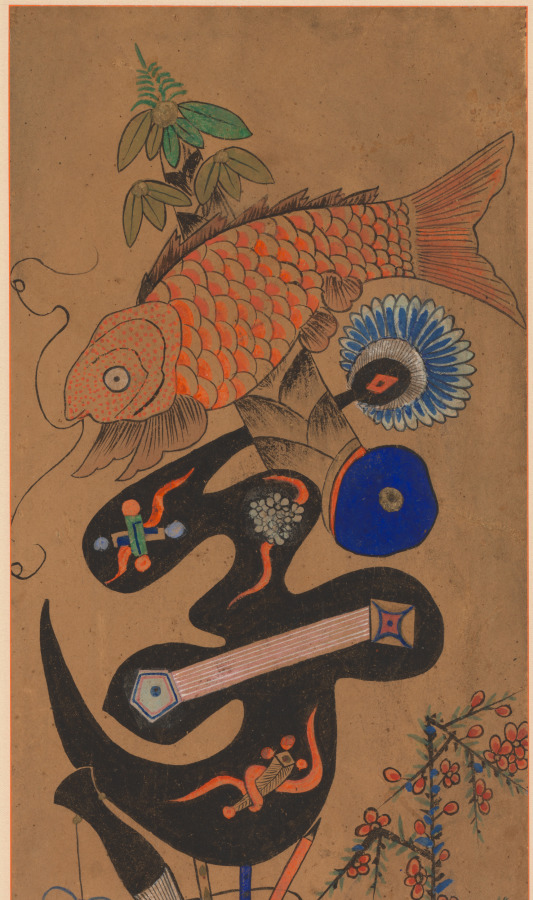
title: Munja-Chaekgeori Screen (Character-Books Screen)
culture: Korea, Joseon dynasty (1392–1910)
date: early 1900s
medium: Eight-panel folding screen, ink on paper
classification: Painting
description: This folding screen is a whimsical harmony of two different subjects: chaekgeori, or books and things; and munja, or characters. The lower section of each panel depicts the imagery of things, including books, decorative arts, and utilitarian objects. The upper portion of each panel bears a classical Chinese character. Read from far right to left, the eight characters refer to the values of Confucian teachings of the Joseon dynasty: filial piety, brotherly love, loyalty, trust, propriety, righteousness, modesty, and humility. While these two pictorial genres are harmoniously conjoined on the same picture plane, two sharply contrasting world views—urban consumerism and traditional Confucian ethics that despise materialism—compete with one another.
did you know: The eight Korean characters each mean filial piety, brotherly love, loyalty, trust, propriety, righteousness or justice, modesty or integrity, and humility or the feeling of shame.